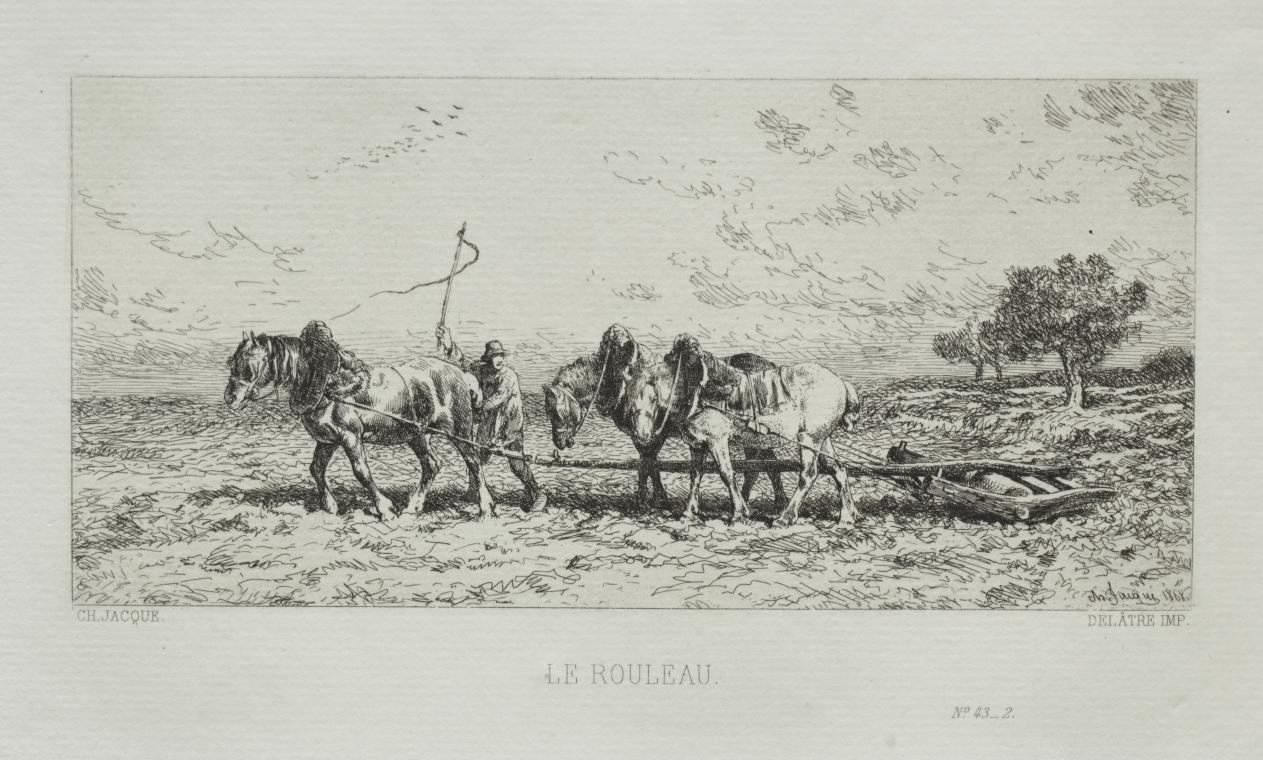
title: The Roller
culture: France, 19th century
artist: Charles-Émile Jacque (French, 1813–1894)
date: 1868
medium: etching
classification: Print